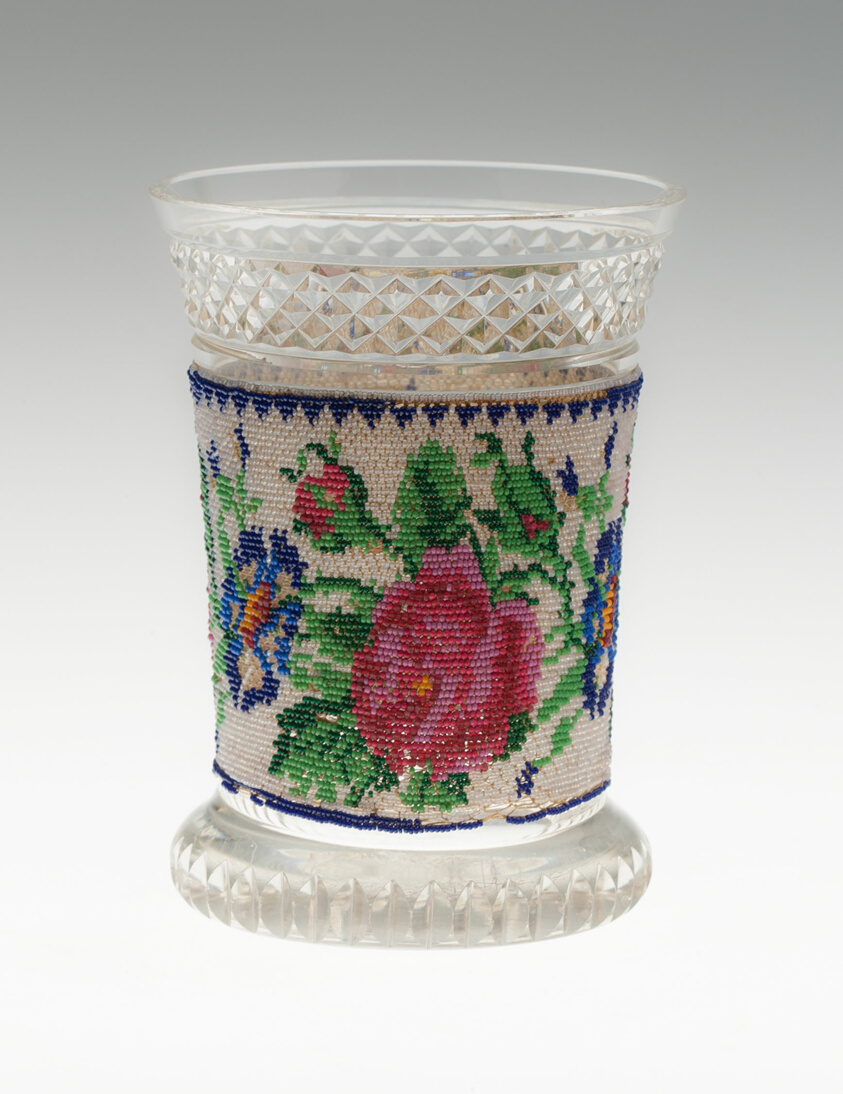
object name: Glass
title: Beaker with Beaded Band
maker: Bohemia, Czech Republic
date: 1820/40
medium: Glass; blown, cut and polished, encased in sleeve of roses and pansies made of colored glass beads woven on a silk net ground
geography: Bohemia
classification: drinking vessel; glass; european decorative arts